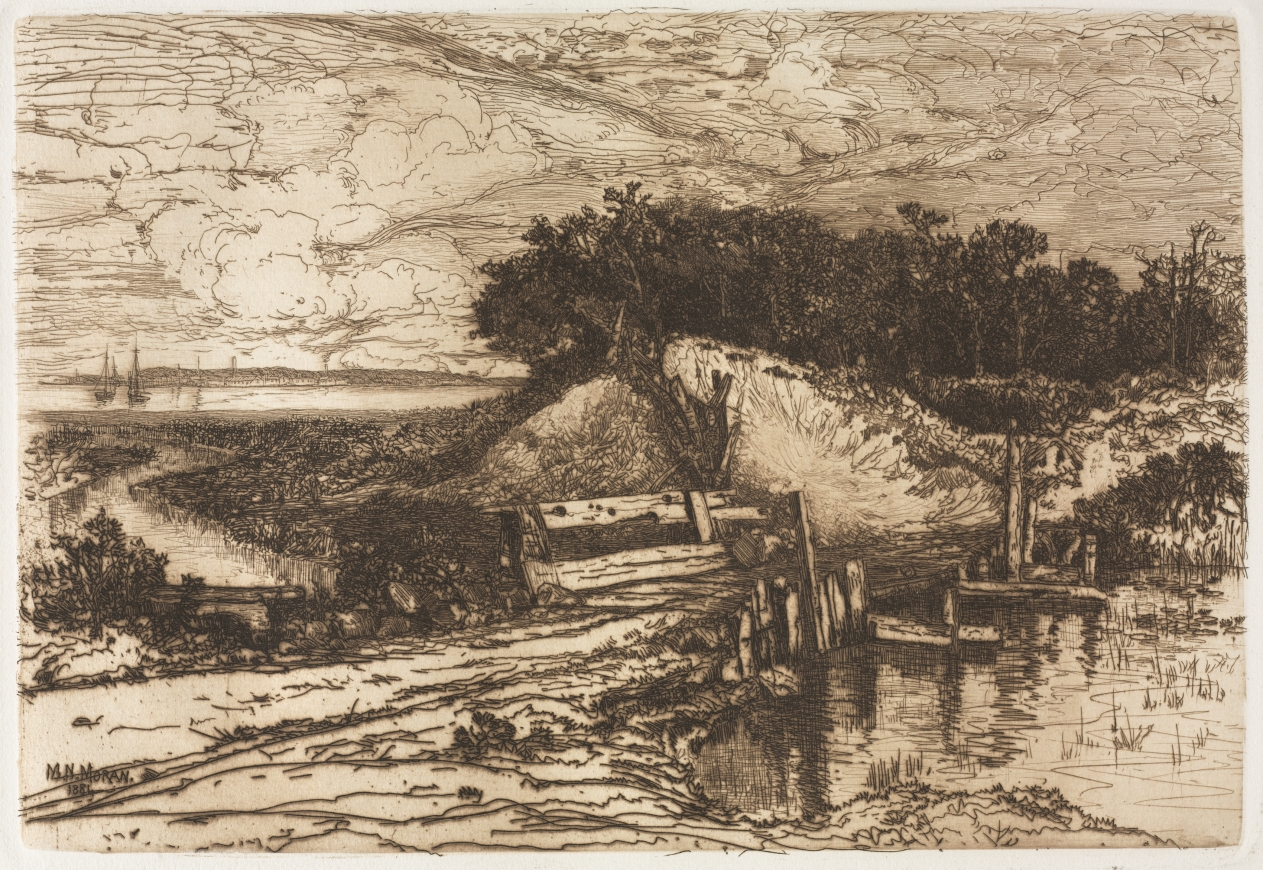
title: Gardiner's Bay, Long Island, seen from Fresh Pond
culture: America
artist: Mary Nimmo Moran (American, 1842–1899)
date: 1881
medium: etching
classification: Print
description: With her husband, Thomas Moran (also in this gallery), Mary Nimmo Moran participated in the American revival of etching by creating fresh, lyrical landscapes such as this view near her home in East Hampton, Long Island. Moran traveled extensively in Europe and was particularly influenced by the Barbizon school (see Corot and Daubigny, elsewhere in the exhibition). Like these French landscape artists, she paid special attention to weather conditions and atmospheric effects, particularly evident inthis turbulent sky. Throughout her career, Moran etched out of doors directly from nature.